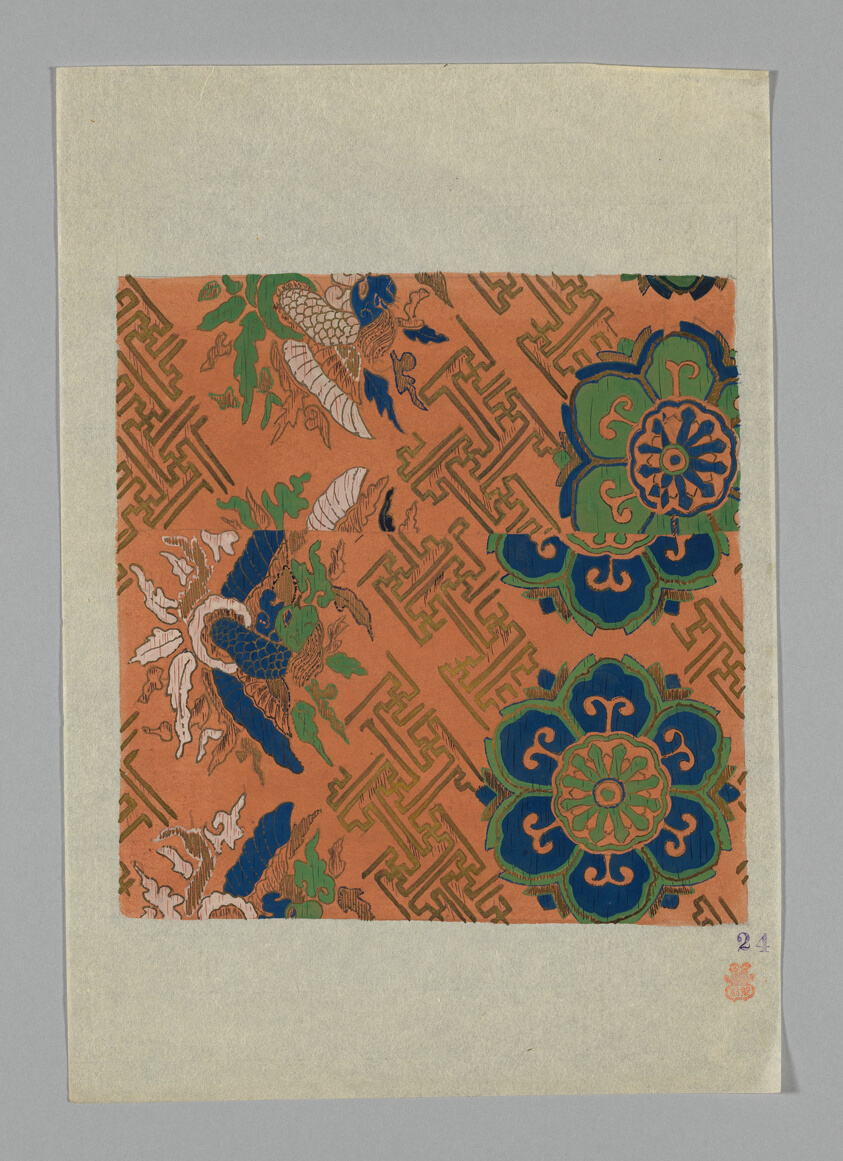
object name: Drawing and Watercolor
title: Design on Paper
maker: Japan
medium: Paper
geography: Japan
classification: textile; accessory - paper design; watercolor; paper